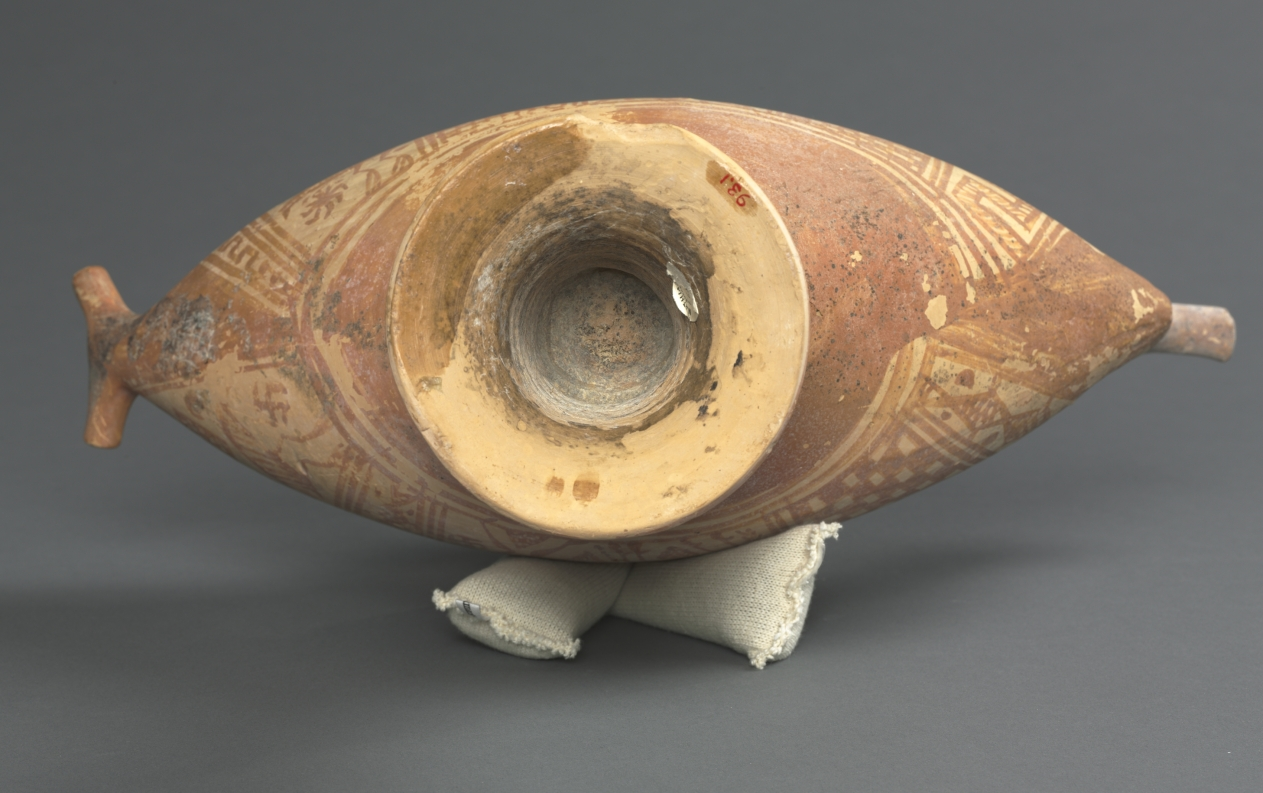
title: Italo-Geometric Bird Askos (Oil Vessel): Hunter (Herakles?) and Stag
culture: Etruscan, likely made at Vulci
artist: attributed to Bisenzio Class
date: c. 700 BCE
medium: ceramic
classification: Ceramic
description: This bird-shaped askos (oil vessel), with a tall filling spout and a pierced beak for pouring, perhaps held perfumed oil for a funerary function. Although the shape likely stems from Italian tradition, the abundantly painted geometric decoration, covering nearly every available surface, derives originally from Greece. Thus scholars have suggested that an immigrant Greek potter working in Etruria may have made the vessel. The sole narrative scene shows a man with a spear leading an antlered animal. If not an anonymous hunter, this could be the earliest known representation of the hero Herakles performing his third labor: capturing the golden-antlered Keryneian hind, or female deer.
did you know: This askos may feature the earliest known representation of Herakles's third labor, the Keryneian hind.